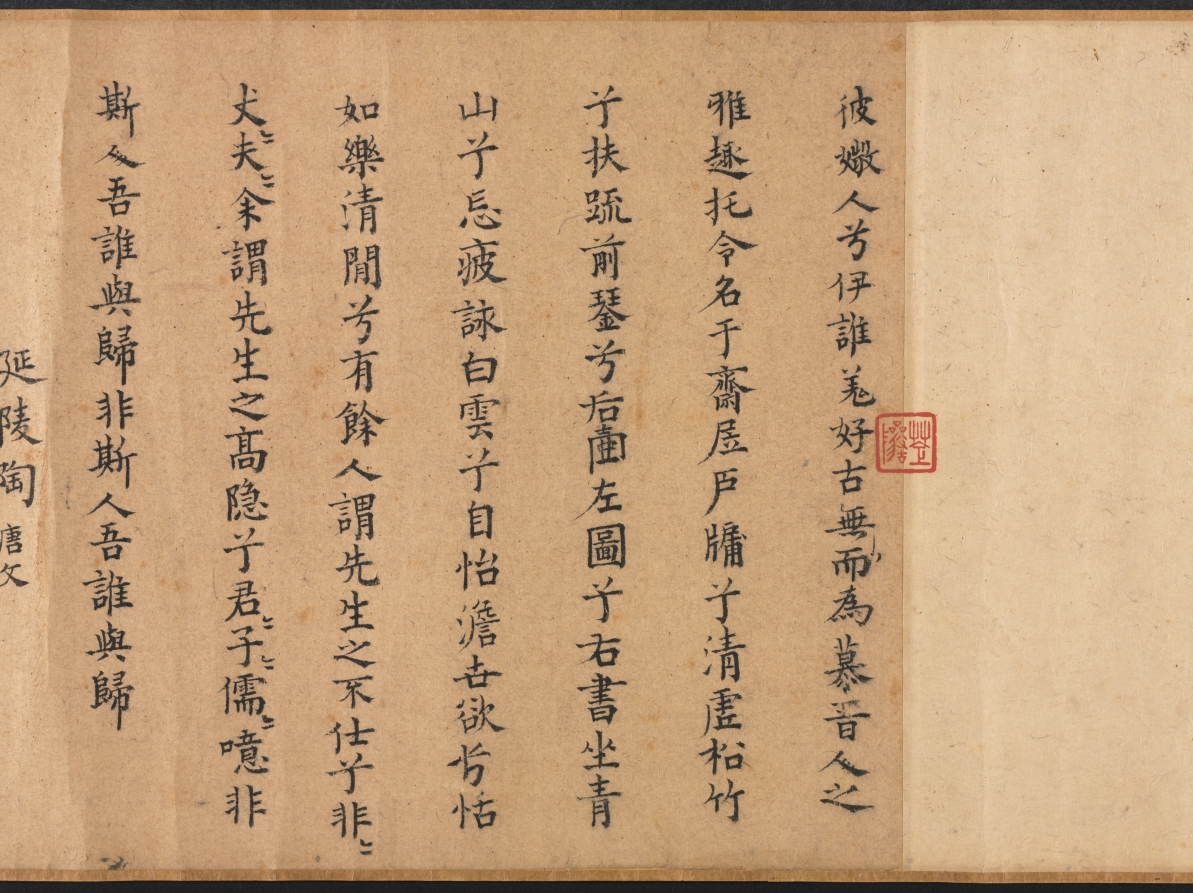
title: Leisure Enough to Spare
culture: China, Yuan dynasty (1271-1368)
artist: Yao Tingmei (Chinese, active mid-1300s)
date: 1360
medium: handscroll, ink on paper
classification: Painting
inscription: 至正廿年春正月_日作此併系鄙語于尾 地偏人遠閉柴關，滿院松陰白晝閒。 眼底風塵渾忘却，坐看流水臥看山。 吳興姚廷美畫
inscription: 23 colophons and 53 seals (dates unavailable for some): 1 colophon, dated 1360, and 2 seals of Yang Weizhen (1296-1370); 1 colophon and 3 seals of Wan Yi; 1 colophon of Zhang Junde; 1 colophon and 3 seals of Angji (act. ca. mid-14th c.); 1 colophon and 1 seal of Xu Shiquan; 1 colophon and 3 seals of Gao Yu; 1 colophon and 2 seals of Li Mingfu; 1 colophon and 2 seals of Lu Lin; 1 colophon and 1 seal of Zhang Qian; 1 colophon of Tao Tangwen; 1 colophon and 1 seal of Wu Yuangui (act. ca. 1300-60); 1 colophon of Bao Jiong; 1 colophon of Wang Zao; 1 colophon and 1 seal of Ma Chuyi; 1 colophon and 1 seal of Lin Yizhuang; 1 colophon and 1 seal of Gu Shunju; 1 colophon and 2 seals of Wang Jing; 1 colophon and 2 seals of Lin Shouchang; 1 colophon and 1 seal of Gao Zhidao; 1 colophon of Lin Xun; 1 colophon, dated 1359, and 2 seals of Meng Weicheng (act. mid-14th c.); 1 colophon and 1 seal of Meng Zhiji (act. mid-l4th c.); 14 seals of Liang Qingbiao 梁清標 (1620-1691); 1 poem dated 1755 and 5 seals of the Qianlong 乾隆 emperor (r. 1736-95); 2 seals of the Jiaqing 嘉慶 emperor (r. 1796-1821); 3 seals of the Xuantong 宣統 emperor (r. 1909-11).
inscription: Title on frontispiece by Zhang Bi 章弼: Signed Gongchen 拱辰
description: Seclusion and leisure—the ideals of the literati, or scholar-gentlemen—are expressed in this mature work by Yao Tingmei. The theme acquired special meaning at a time of the military uprisings near the end of the Yuan dynasty. Dedicated to an ascetic named Du, this work combines painting, calligraphy, and poetry; following the painting are more than 20 poems and essays written by notable scholars, one of whom was the calligrapher Yang Weizhen. It reveals not only the aesthetic taste of the literati but also the practice of contributing artistic and literary works to fulfill social obligations. Yao's painting demonstrates his individual style derived from various ancient masters (Guo Xi, Dong Yuan, and Juran). Yang Weizhen's calligraphy exhibits his bold, vigorous style and his intent to capture the spirit of antiquity in art.